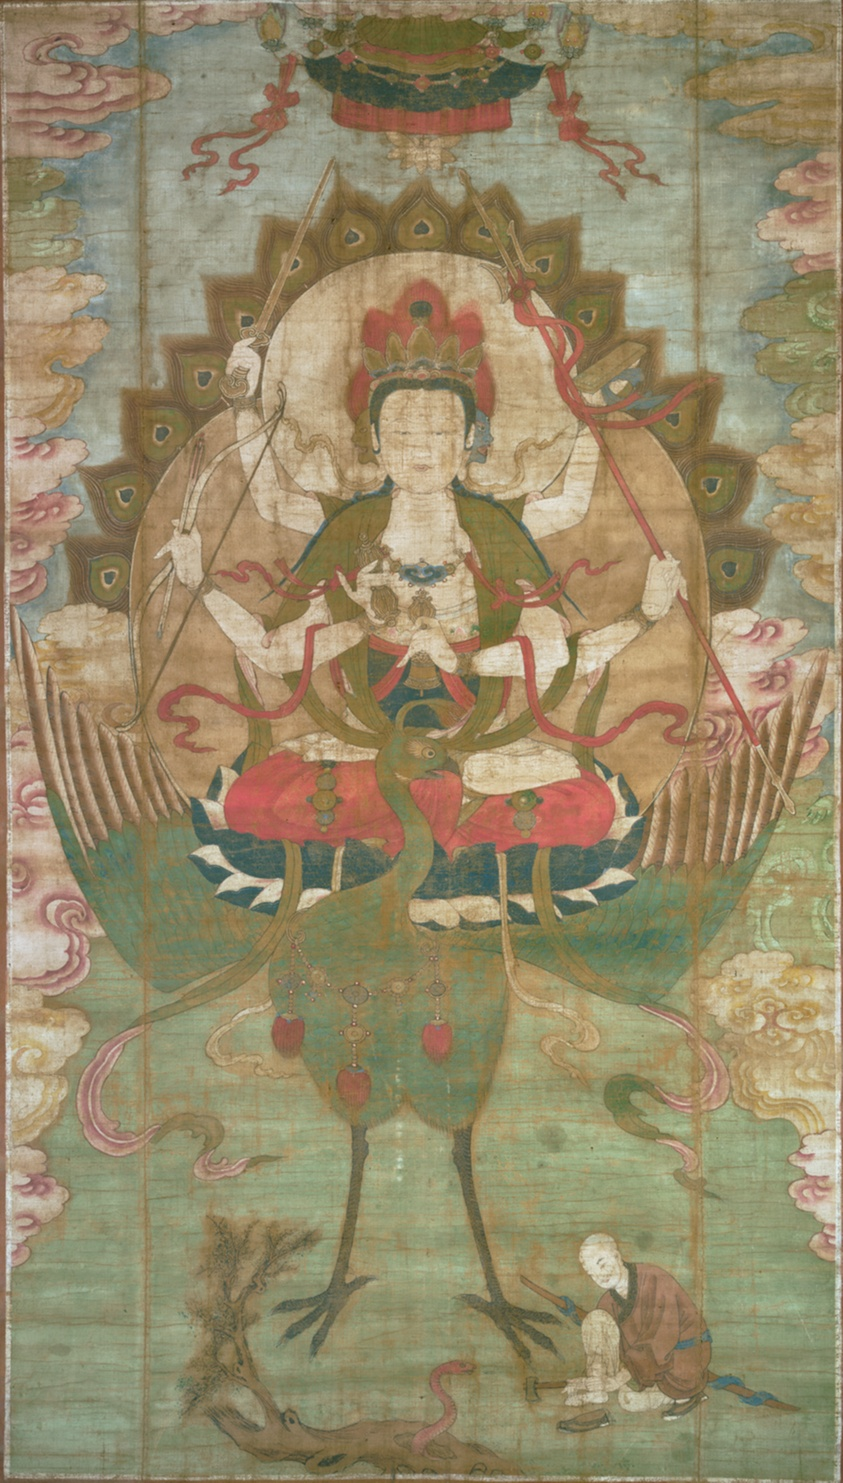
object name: Painting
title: Mahamayuri Vidyaraja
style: Chinese (culture or style), liao, East Asian, asian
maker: Artist unknown; Chinese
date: Liao dynasty (916–1125), 11th century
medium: Ink and colors on cotton (framed)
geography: China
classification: painting